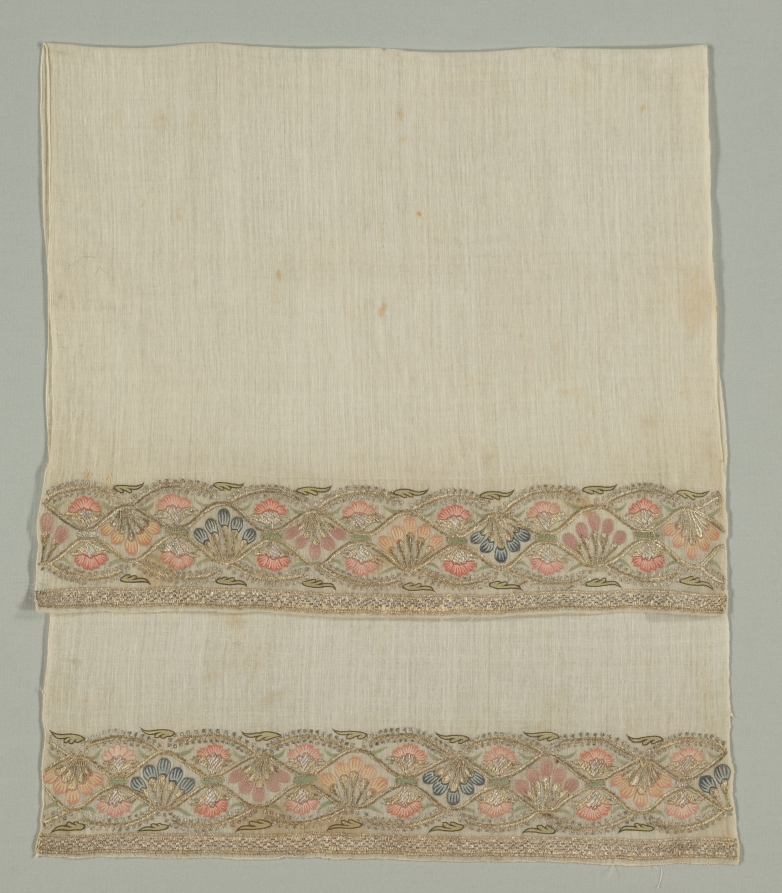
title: Embroidered Towel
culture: Turkey, 19th century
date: 19th century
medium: embroidery: silk, gold and silver filé on linen tabby ground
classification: Embroidery